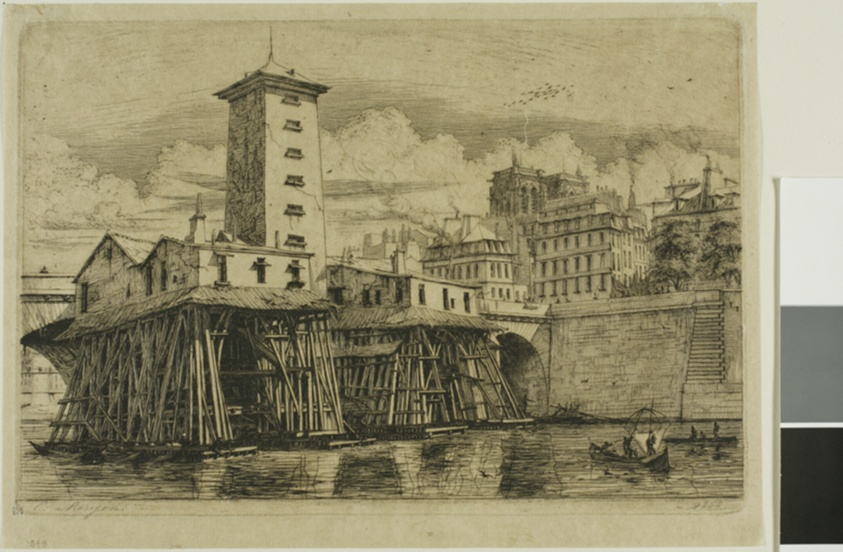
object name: Print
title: La Pompe Notre-Dame, Paris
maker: Charles Meryon (French, 1821-1868)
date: 1852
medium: Etching with drypoint on tan laid paper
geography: France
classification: etching; print; prints and drawing